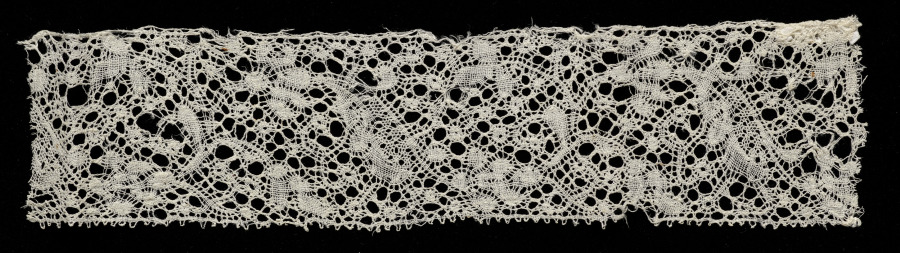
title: Lace Edging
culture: Spain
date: 1700s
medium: Bobbin lace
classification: Lace